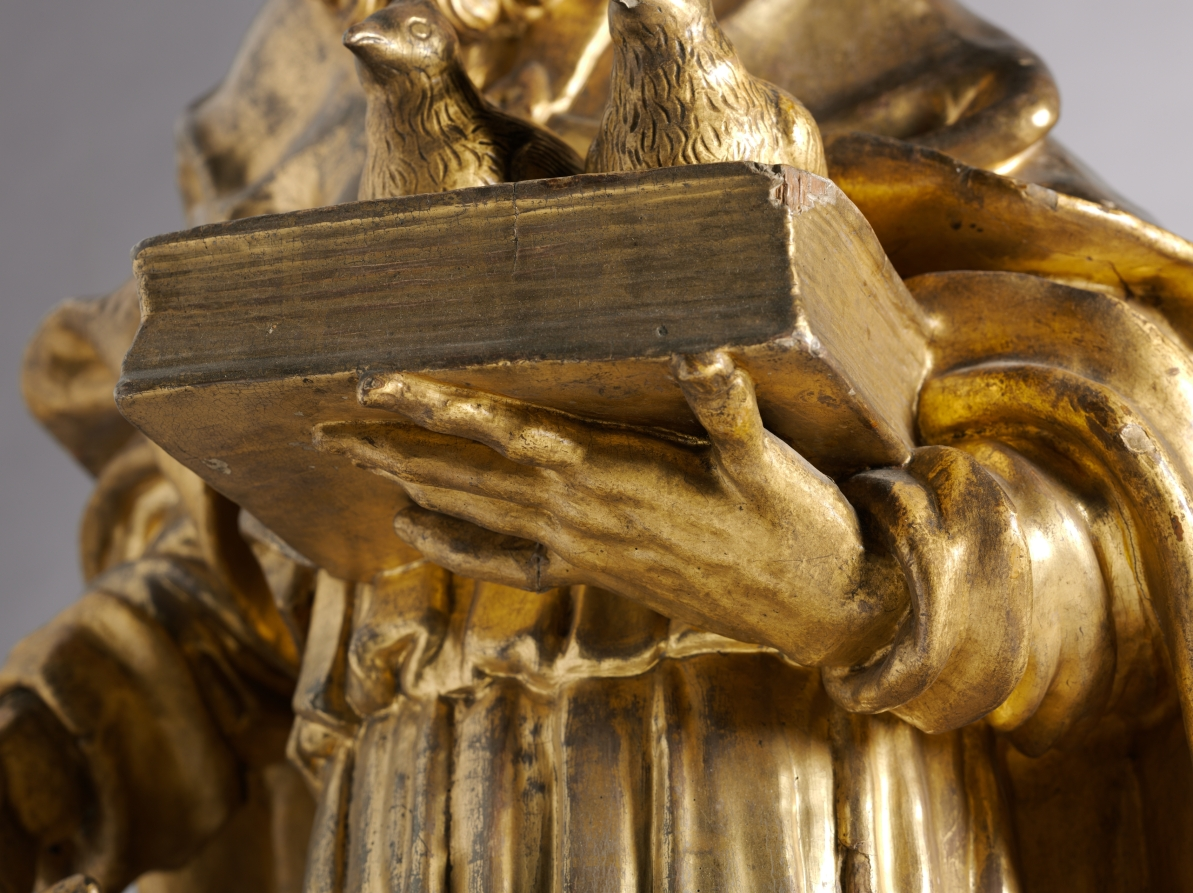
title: Saint Joachim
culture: Germany, 18th century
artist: Joseph Anton Feuchtmayer (German, 1696–1770)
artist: or Circle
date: c. 1760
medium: gilded wood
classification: Sculpture